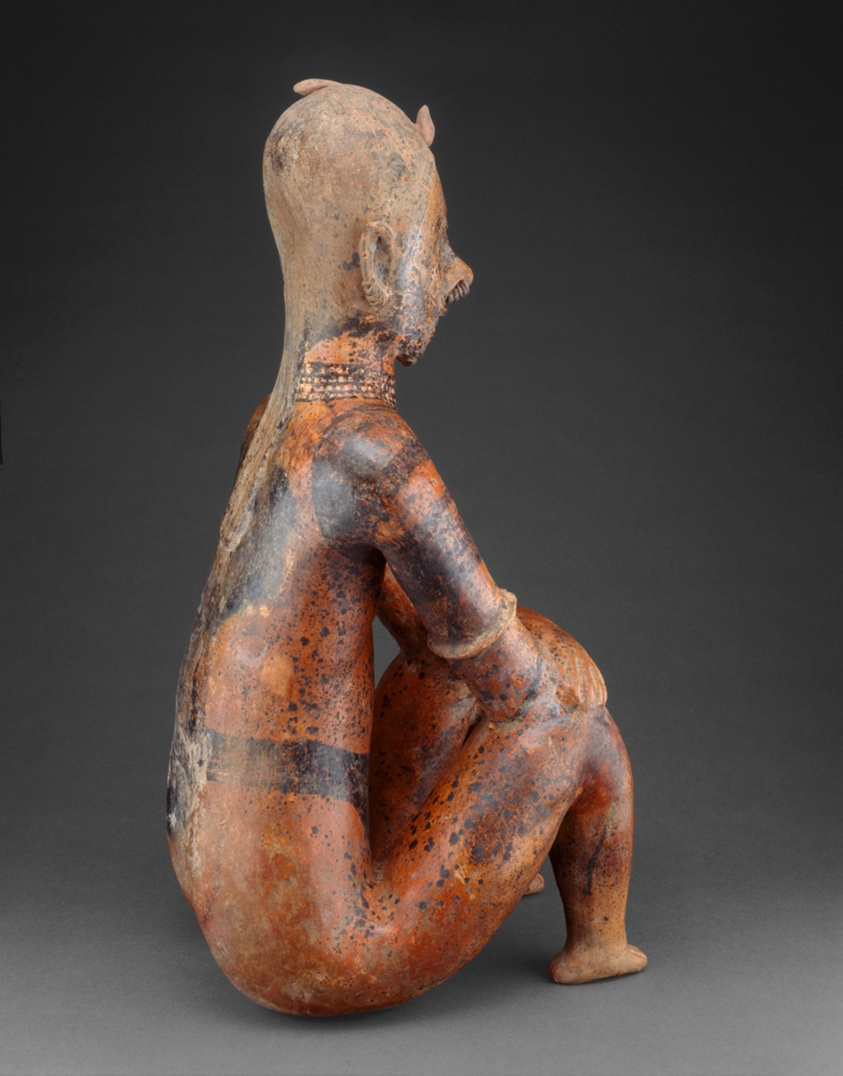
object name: Sculpture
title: Figure of a Seated Chieftain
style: nayarit, west mexico, mesoamerican, lagunillas, americas, Arts of the Americas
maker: Nayarit (Lagunillas area, Nayarit, Mexico)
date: 100 BCE–250 CE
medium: Ceramic and pigment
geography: Nayarit state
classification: ceramics; earthenware; art of the americas; sculpture; funerary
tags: people, offering, ancestors, rulers (people), rulership, tattoos